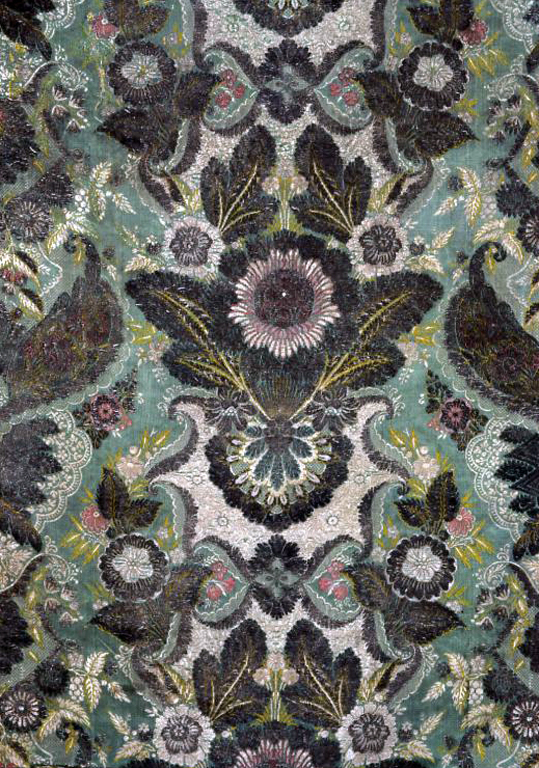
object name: Textile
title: Panel (Showing "Lace" Design)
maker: France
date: c. 1726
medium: Silk, silvered-metal-strip-wrapped silk, warp-float faced 7:1 satin weave with supplementary brocading wefts and supplementary binding warps tying some self-patterning ground wefts in plain interlacing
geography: France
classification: textile; weaving